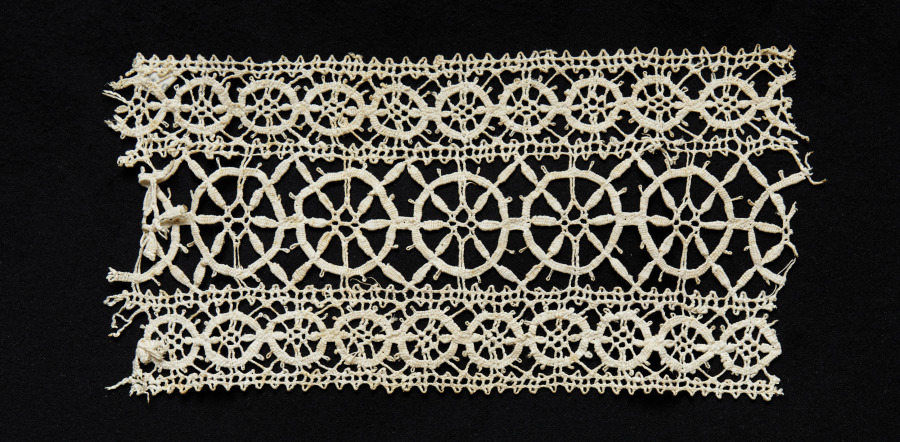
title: Lace Insertion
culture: Italy, Genoa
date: 1600s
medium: Bobbin lace (needle lace, drawnwork design)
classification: Lace